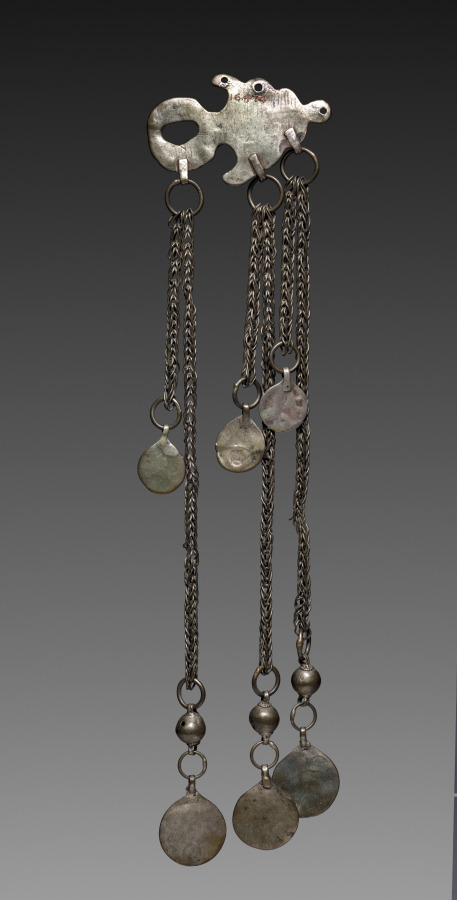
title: Clasp (part 1)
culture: Palestine, Ramallah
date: early 1900s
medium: silver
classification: Jewelry